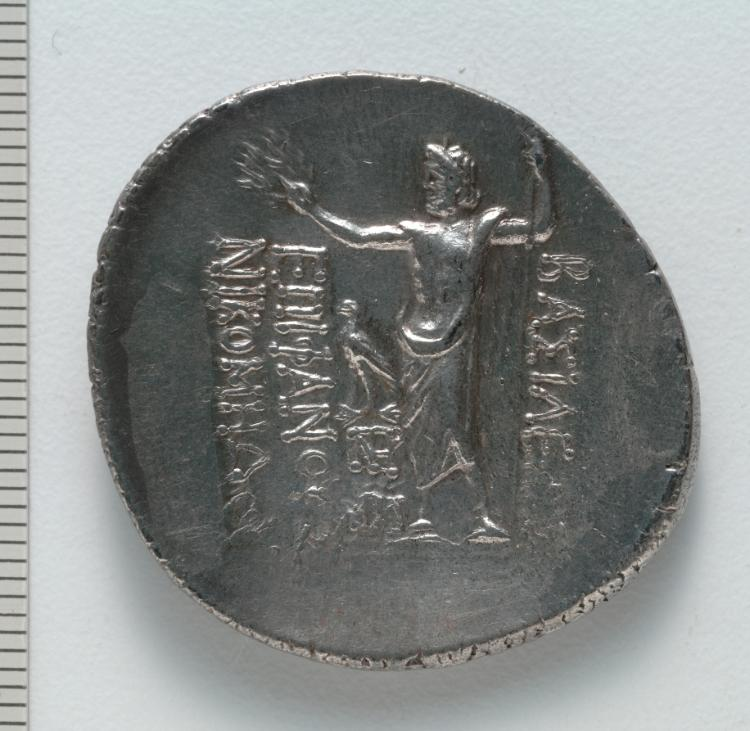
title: Tetradrachm: Zeus, eagle (reverse)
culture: Greek, Bithynian, minted in Bithynia, reign of Nicomedes II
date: 149–120 BCE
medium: silver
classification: Coins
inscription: ΒΑΣΙΛΕΩΣ | ΕΠΙΦΑΝΟΥΣ | ΝΙΚΟΜΗΔΟΥ